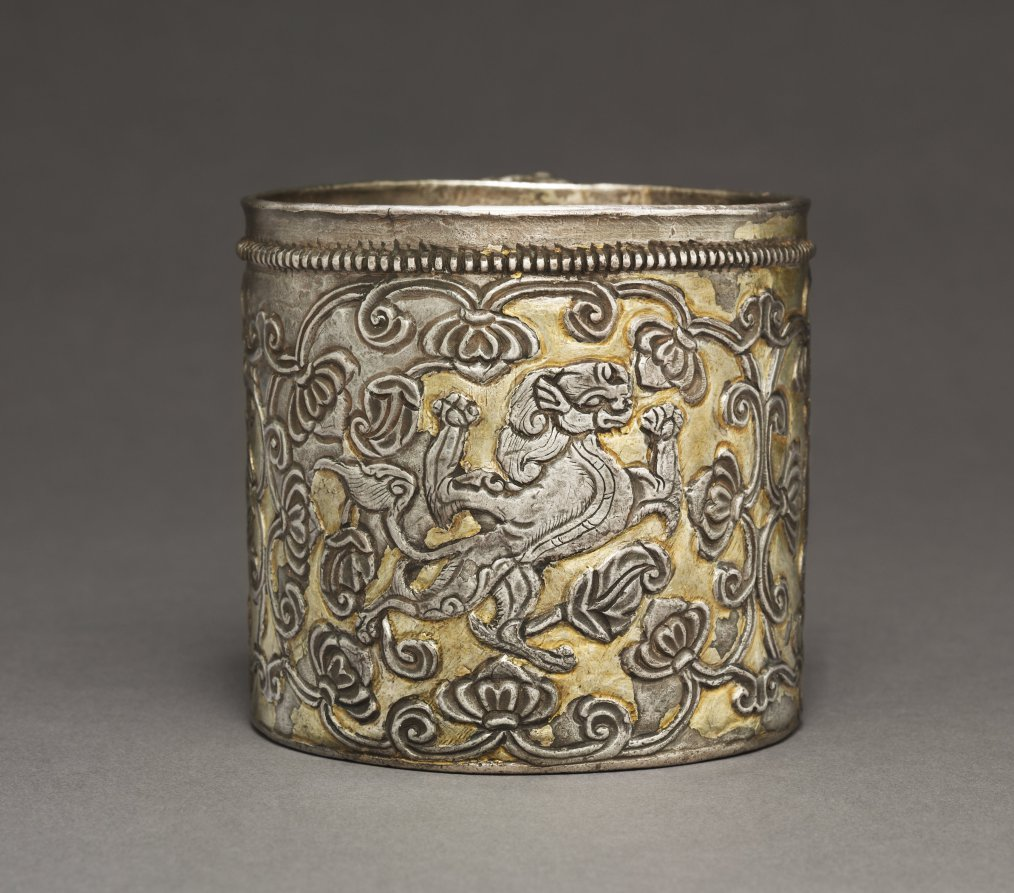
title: Beaker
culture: Central Asia (Sogdiana) or Tibet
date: c. late 600s–early 700s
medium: silver with gilding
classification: Silver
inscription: Inscribed on bottom of the cup: "Phan shing gong skyes gui sug byad (or byang)"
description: The circular shapes of the cup’s handle feature a flat edge on which the user rested their thumb for better grip, a design characteristic of silver objects made during the 700s by Sogdian artists, who traveled from Central Asia along international trade routes. An ownership inscription in Tibetan script on the underside of the cup identifies the vessel as a personal possession. The circles and lines carved below this inscription are likely measurements recording the weight of the silver used for the cup.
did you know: This cup depicts two lions and a lionlike animal with horns!